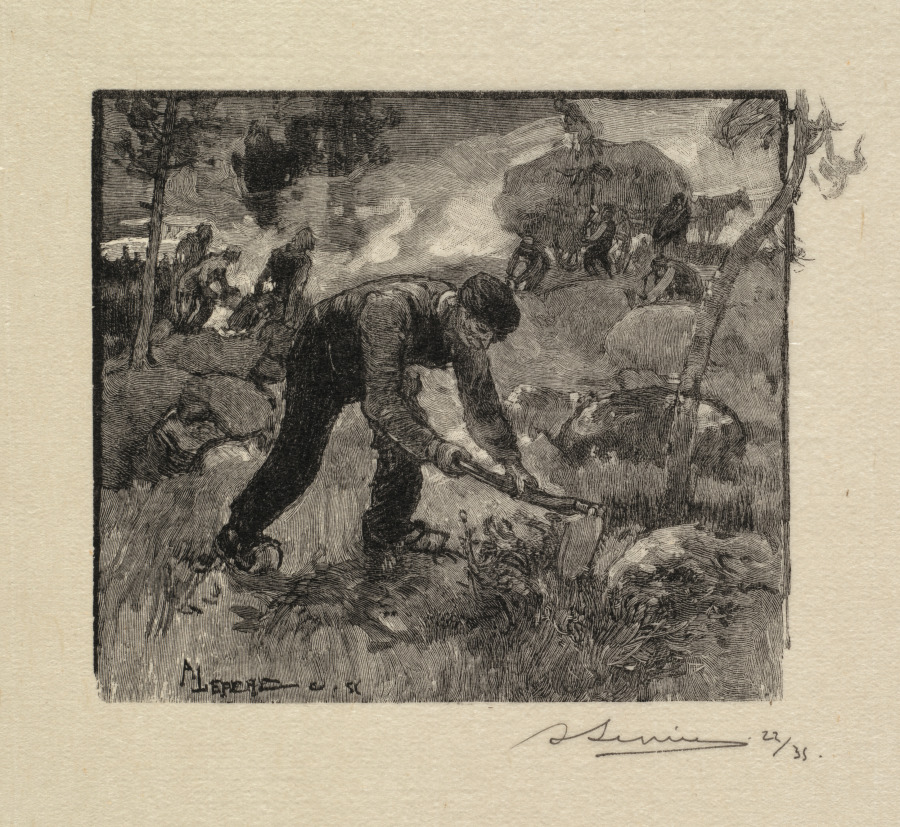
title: Fontainebleau Forest: Pulling the Heather (La Forêt de Fontainebleau: Arracheurs de Bruyères)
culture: France, 19th century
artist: Auguste Louis Lepère (French, 1849–1918)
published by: A. Desmoulins, Published in Revue Illustrée, 1887–90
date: 1890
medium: wood engraving from bound volume of 34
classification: Bound Volume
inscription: Below image, lower right, in black ink: ALepère 22/35; in block, lower left: A. LEPÈRE / Del. SC; on window mat, lower right, in graphite: Arracheurs de Bruyères